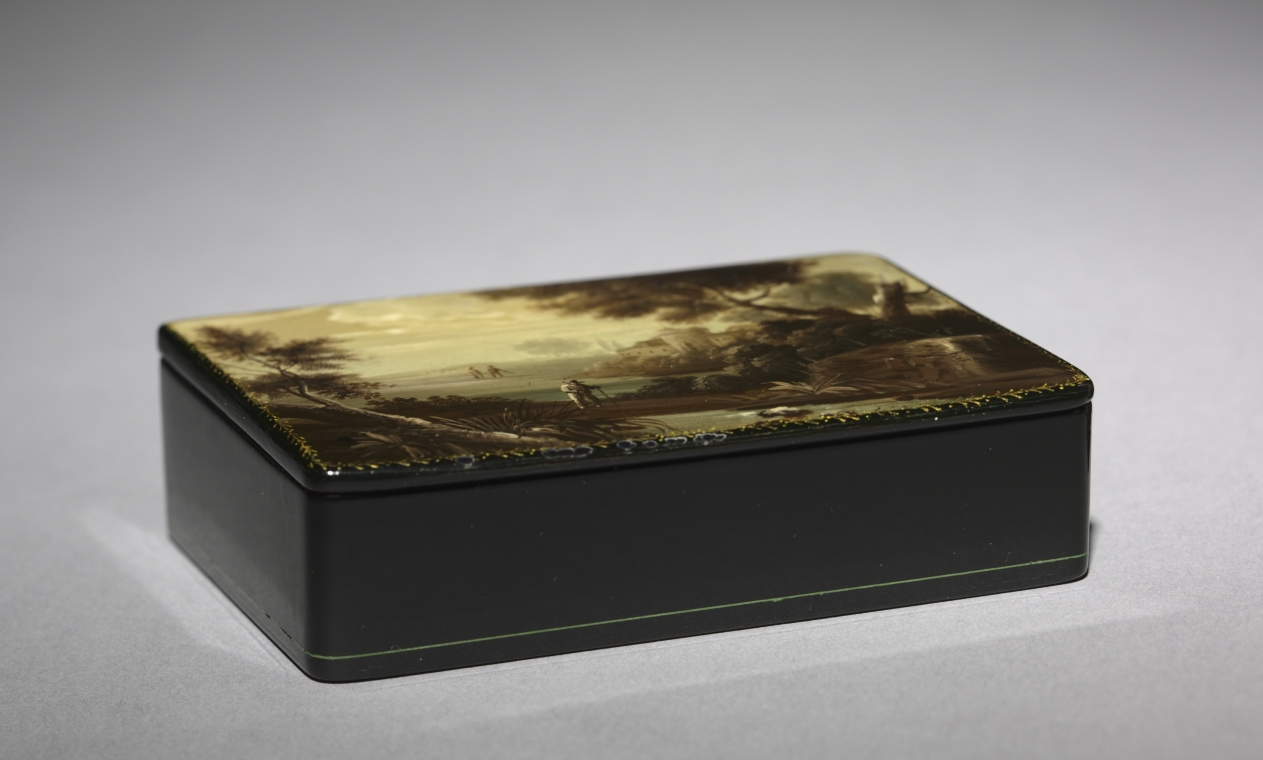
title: Snuff Box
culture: Russia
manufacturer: Lukutin Factory (Russian, 1818–1904)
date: 1800s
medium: wood with black lacquer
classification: Miscellaneous